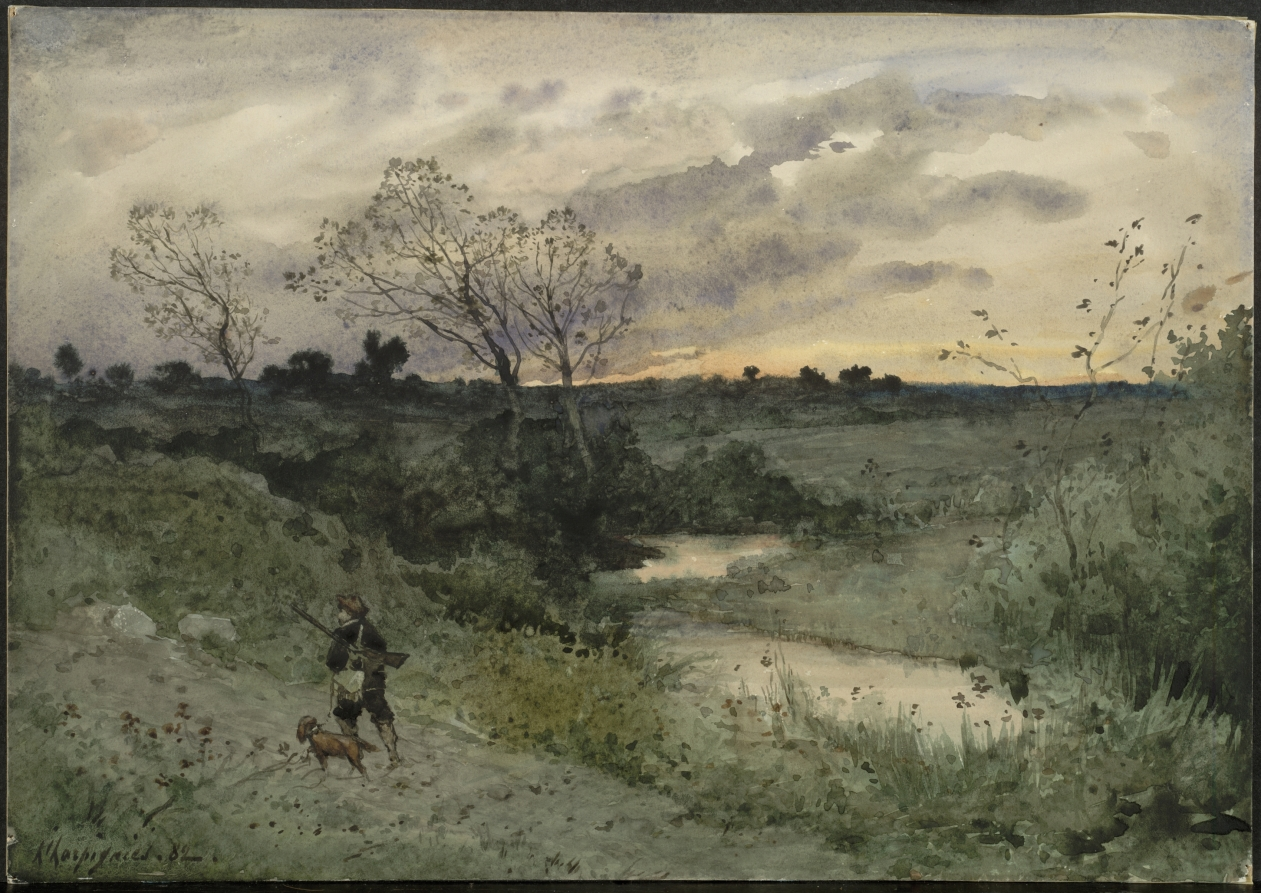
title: Dawn—Hunter with Dog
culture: France, 19th century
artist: Henri Joseph Harpignies (French, 1819–1916)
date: 1882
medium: watercolor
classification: Drawing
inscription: signed, lower left, in black watercolor: h'harpignies . 82.; verso of secondary support, upper center, in graphite: 722 [circled]; lower left, in graphite: 539 [circled]; lower right, in graphite: Gold Whistler / 539 Anderson; lower right, in graphite: a.21708.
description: Created at the height of Henri Harpignies's career, this large watercolor landscape features the artist's characteristic gray-green palette. Harpignies developed the composition using overlapping planes unified by a meandering stream or road. It is impossible to identify the exact setting of the image, which instead was likely meant as a souvenir of the French countryside Harpignies knew well and represented often.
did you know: The figure seen in this drawing was typical of Henri Harpignies's watercolors, which often featured hunters, fishermen, hikers, and sometimes artists.